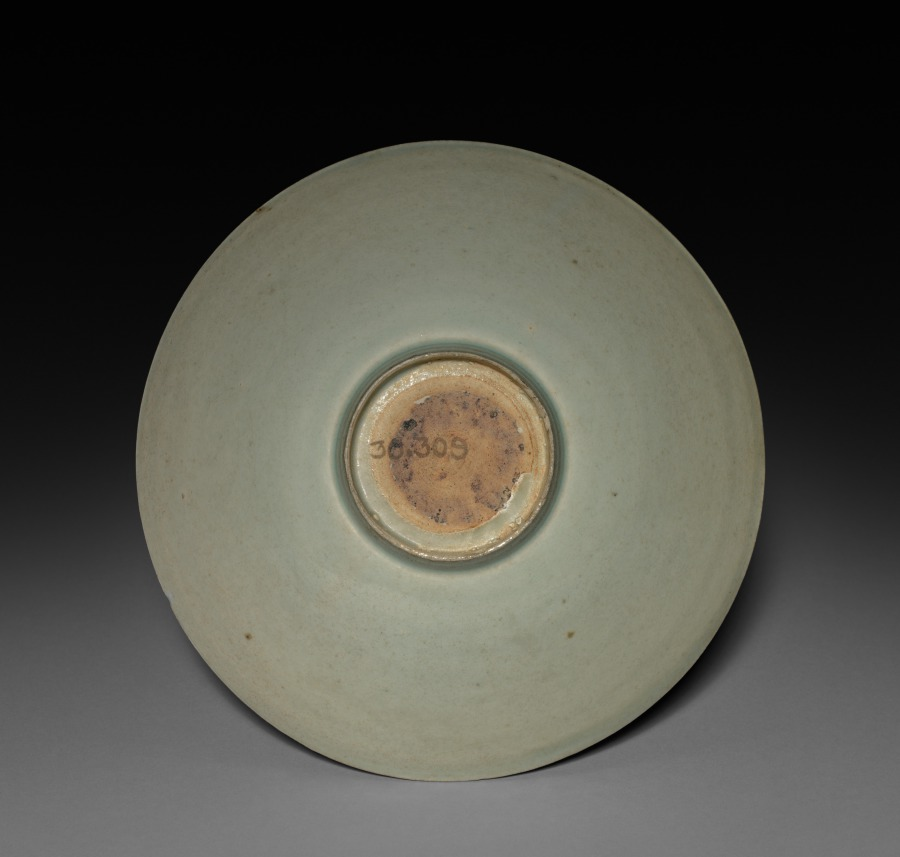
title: Bowl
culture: China, Southern Song dynasty (1127-1279)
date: 1100s–1200s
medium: Glazed porcelain, qingbai ("blue-white") ware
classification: Ceramic